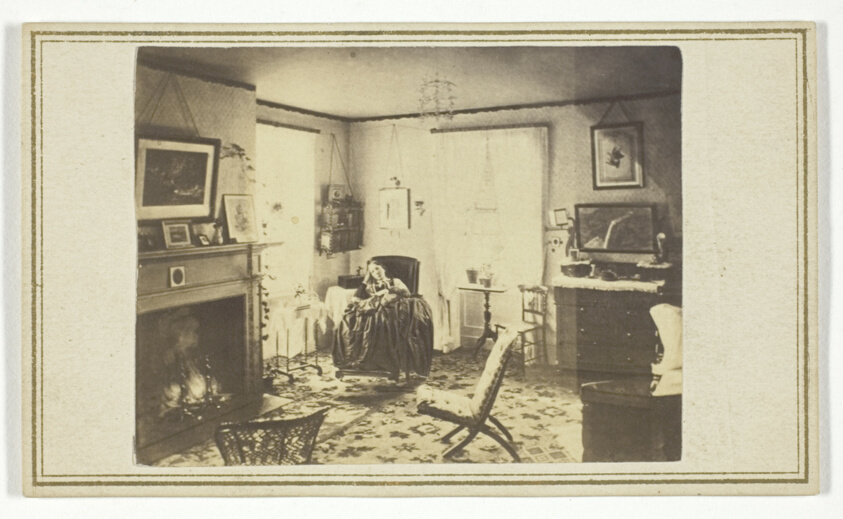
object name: Photograph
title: Untitled (Woman in Interior of House)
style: 19th century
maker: J. C. Spooner (American, 1827–1919)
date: 1846/99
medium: Albumen print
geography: United States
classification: photographic process; photography; card photographs; photograph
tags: Collected by Hugh Edwards